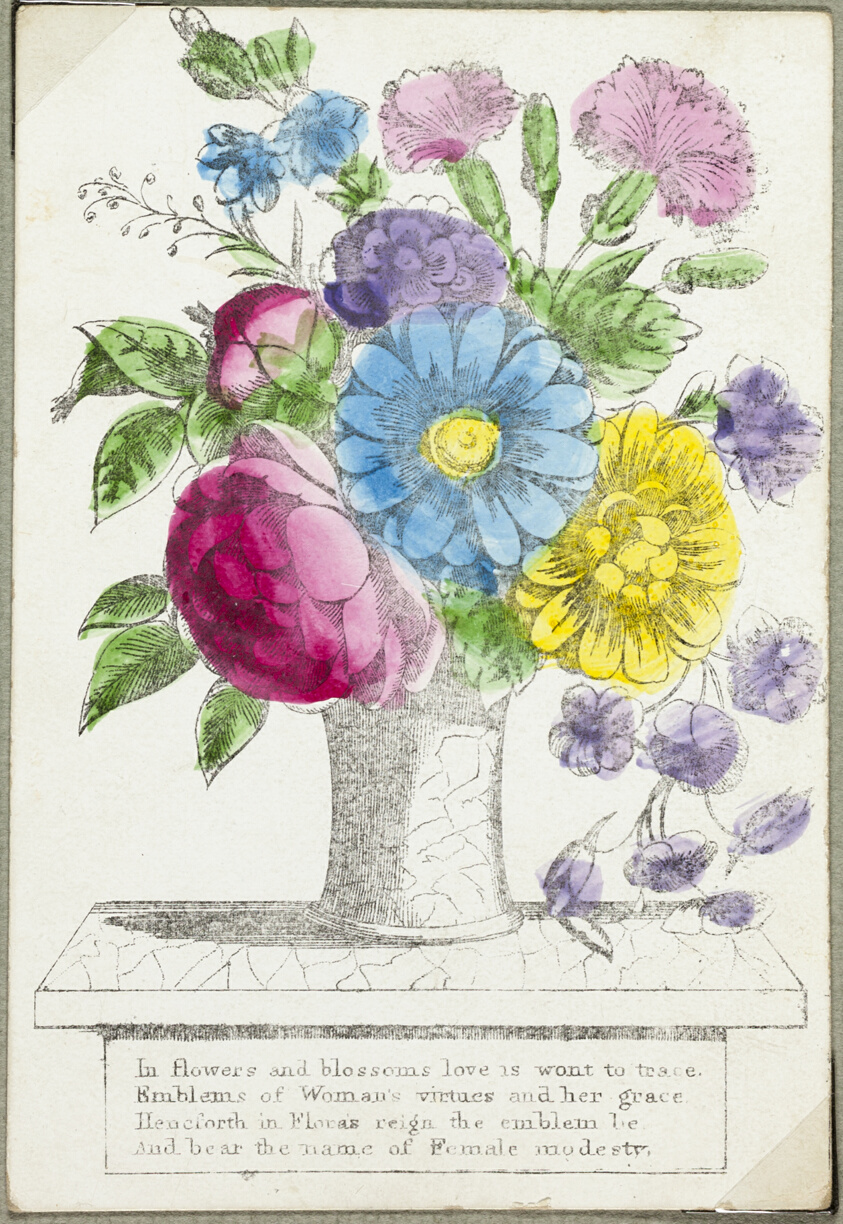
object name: Print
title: In Flowers and Blossoms (valentine)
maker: Unknown Artist; American or English, 19th century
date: c. 1830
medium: Engraving with hand-coloring on ivory card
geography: United States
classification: valentine; prints and drawing; print